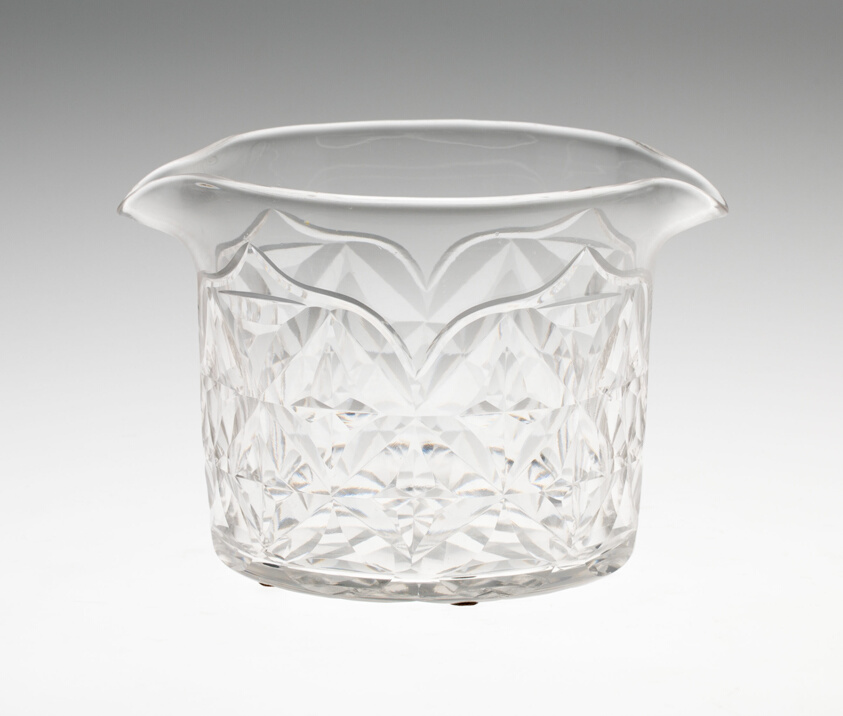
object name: Glass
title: Wine Glass Rinser (verrière)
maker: France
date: c. 1815/25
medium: Glass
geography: France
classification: glass; vessel for serving food; european decorative arts